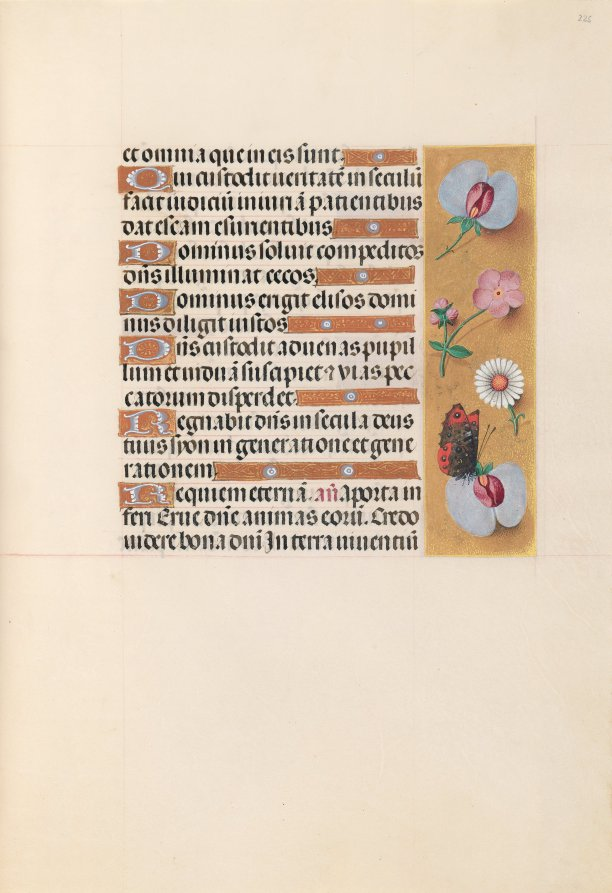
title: Hours of Queen Isabella the Catholic, Queen of Spain: Fol. 225r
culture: Flanders, Ghent and Bruges, late 15th century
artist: Master of the First Prayerbook of Maximillian (Flemish, c. 1444–1519)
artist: and Associates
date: c. 1500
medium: ink, tempera, and gold on vellum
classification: Bound Volume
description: This manuscript was illuminated by a circle of at least five highly organized manuscript painters active in the Flemish cities of Ghent and Bruges. The principal illuminator was Alexander Bening, who painted the majority of the book's miniatures. Manuscripts produced by this circle of artists are renowned for the decoration of their borders, which typically feature a rich variety of realistically-painted flowers, birds, and butterflies. This prayer book, called a book of hours, was intended not for a cleric, but for the private devotions of a lay person-in this case, Isabella the Catholic, Queen of Spain (1451-1504). Isabella's coat of arms embellishes the book's frontispiece. It is unlikely that the book was commissioned by the Queen herself; rather, she probably received it as a diplomatic gift from someone courting her patronage, perhaps Cardinal Francisco Jimenez de Cisneros. A Franciscan friar, Jimenez was dependent upon Isabella for his advancement, first to the post of Queen's confessor in 1492, and then to Archbishop of Toledo in 1495.